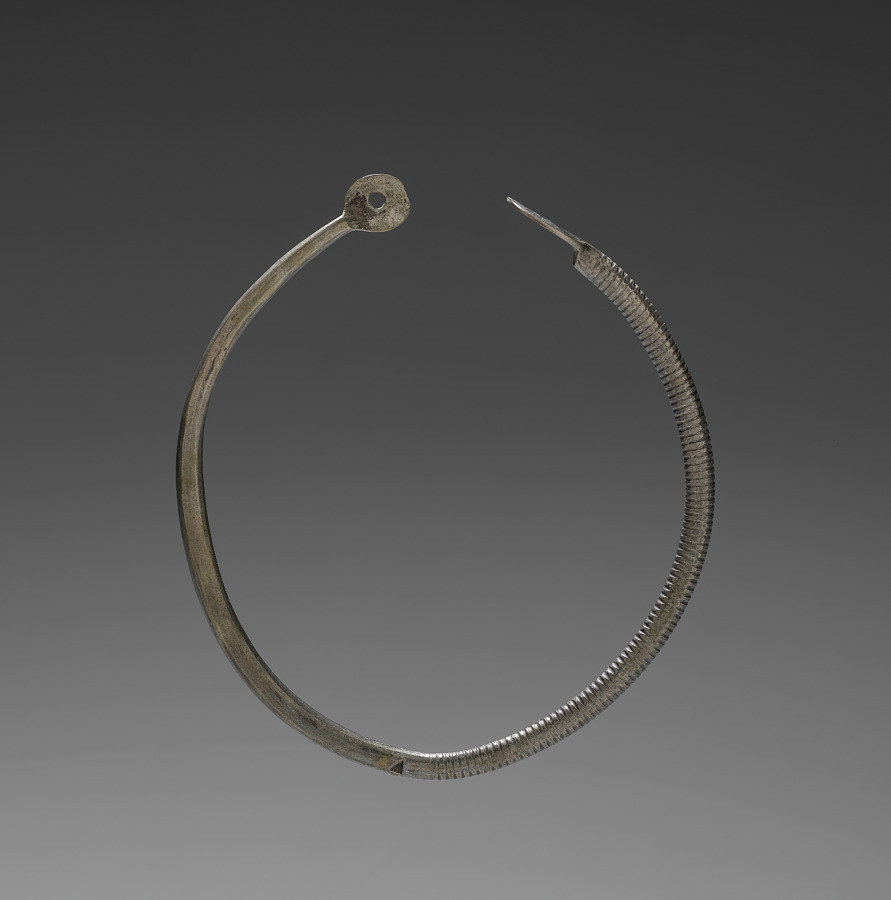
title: Nose Ring (?)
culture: India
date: 1800s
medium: silver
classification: Jewelry